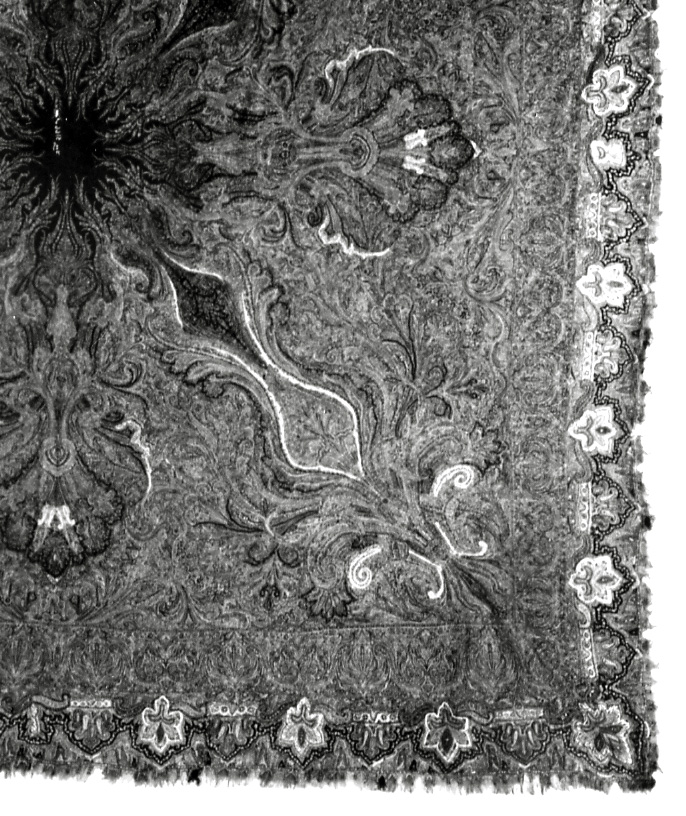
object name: Costume and Accessories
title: Shawl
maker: Eastern India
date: 1870s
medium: Wool, woven of multicolored threads; embroidered border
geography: India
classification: textile; weaving; costume; dress (garment); clothing